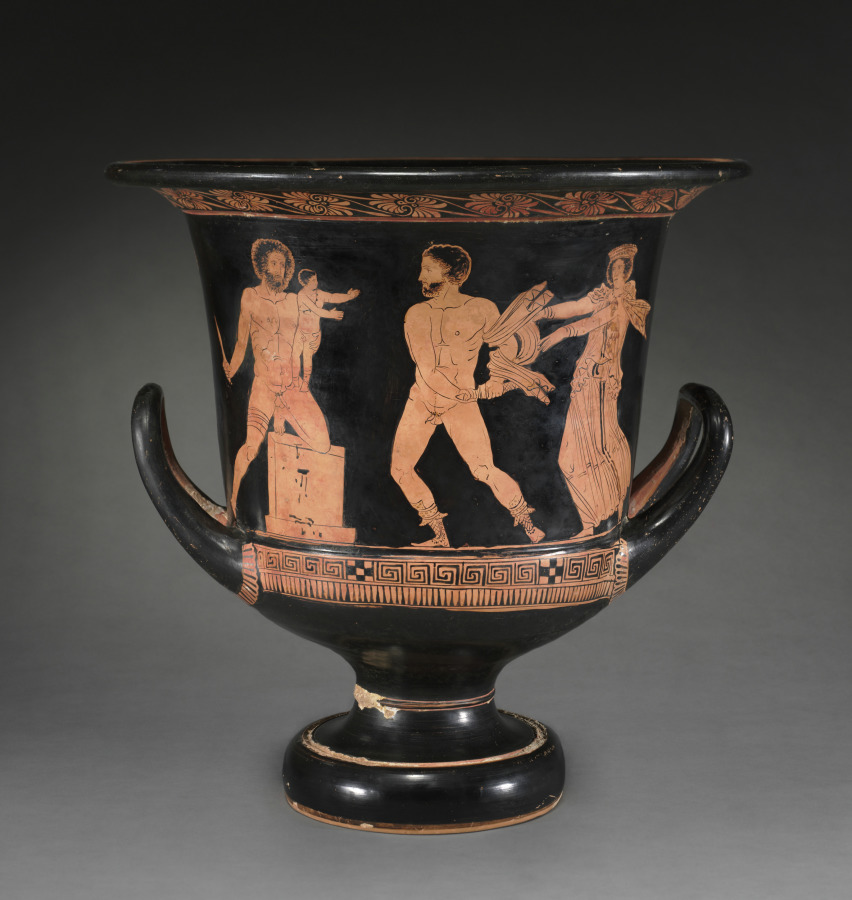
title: Red-Figure Calyx-Krater (Mixing Vessel): Medea in Chariot (A); Telephos with Baby Orestes (B)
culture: South Italian, Lucanian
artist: near the Policoro Painter (South Italian, Lucanian, active c. 400 BCE)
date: c. 400 BCE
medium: ceramic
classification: Ceramic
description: The remarkable scene on the front of this vase relates to the famous tragedy Medea, written by Euripides and first produced in Athens in 431 BC. Framed in the center by a halo (recalling her sun god grandfather Helios), the sorceress Medea flies off in a dragon-drawn chariot. Seeking revenge against her husband Jason, leader of the Argonauts, Medea has just slain their two children. Two Furies flank her, while Jason and a distraught nurse and teacher approach the bodies on the altar below. A different tragedy unfolds on the other side of the vase, from Euripides’s Telephos (438 BC). The wounded warrior Telephos holds the baby Orestes hostage at an altar, with Agamemnon and Clytemnestra rushing to save their son.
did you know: This vase includes scenes connected to two Athenian tragedies dealing with children—Medea and Telephos.